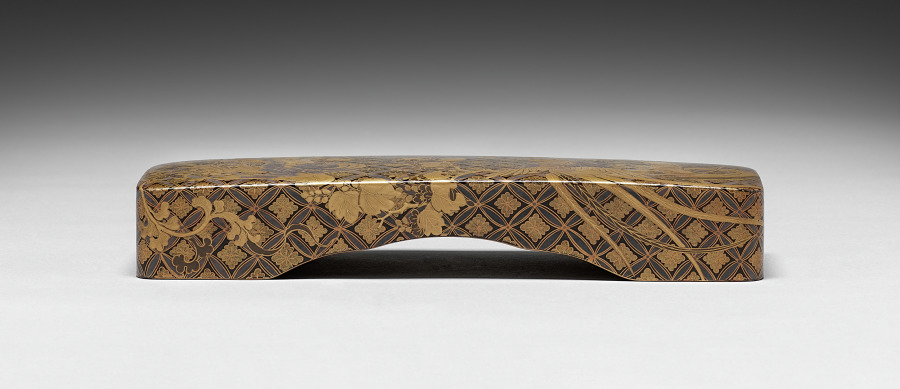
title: Letter Box (lid)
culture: Japan, Edo period (1615–1868)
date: 1615–1868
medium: lacquer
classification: Lacquer